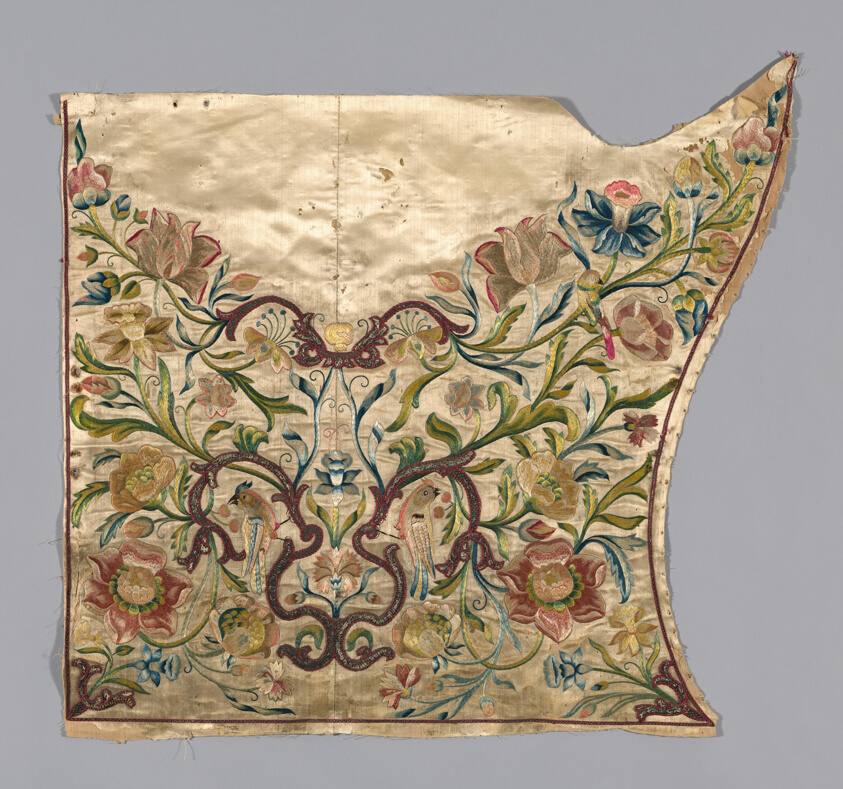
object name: Textile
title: Panel (formerly Cover from a Sedan Chair)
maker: France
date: c. 1720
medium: silk compound weave, brocaded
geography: France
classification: textile; needlework (visual works)